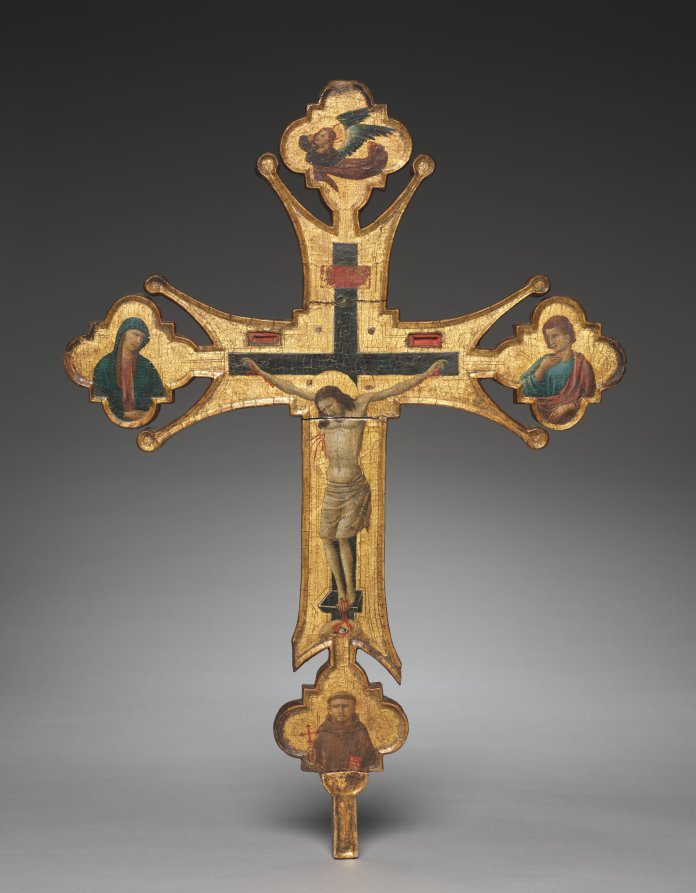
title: Processional Cross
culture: Italy, Umbria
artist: Master of Santa Chiara (Italian)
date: c. 1320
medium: oil on canvas on wood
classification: Painting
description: This cross was originally mounted on a tall pole and carried in religious processions. Therefore, the figures on each side are almost identical. In the center is Christ crucified. Looking on from the elaborate terminals at left and right are the Virgin and Saint John. The bottom terminal shows a different saint on each side: Saint Francis on one and Saint Clare on the other. At the top of each side is an angel. Although one angel looks up and the other down, both express intense grief in their faces and gestures. The Master of Santa Chiara is the name given to this unknown artist who painted this and several other works in Assisi. In that city, Saint Francis founded an order of friars while Saint Clare established a counterpart for women called the Poor Clares. The presence of both saints on this cross suggests that it was made for one of Assisi's Franciscian institutions.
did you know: This cross is painted on both sides so that while being carried in a procession the images are visible to a crowd; both sides are not quite identical.